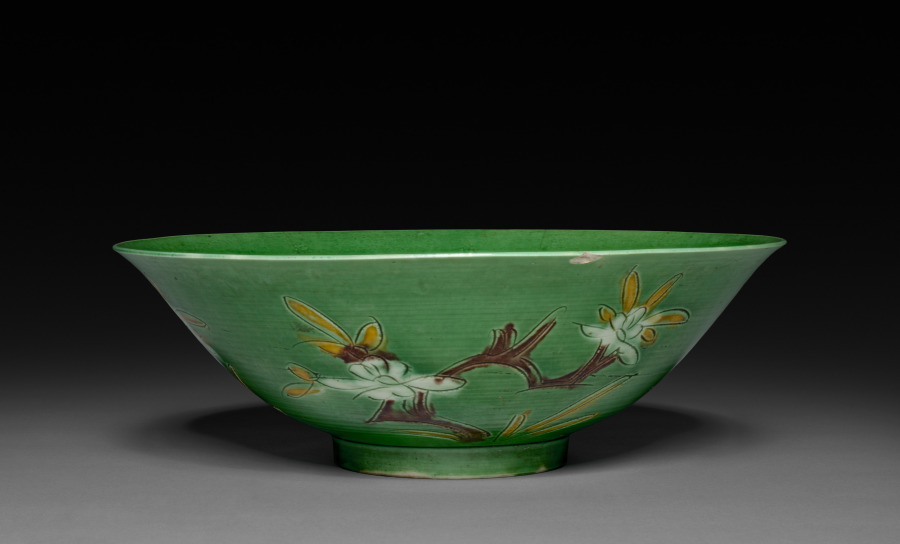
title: Bowl with Sprays of Flowers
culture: China, Jiangxi province, Jingdezhen kilns, Qing dynasty (1644-1911), Kangxi reign (1662-1722)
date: 1662–1722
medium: porcelain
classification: Ceramic